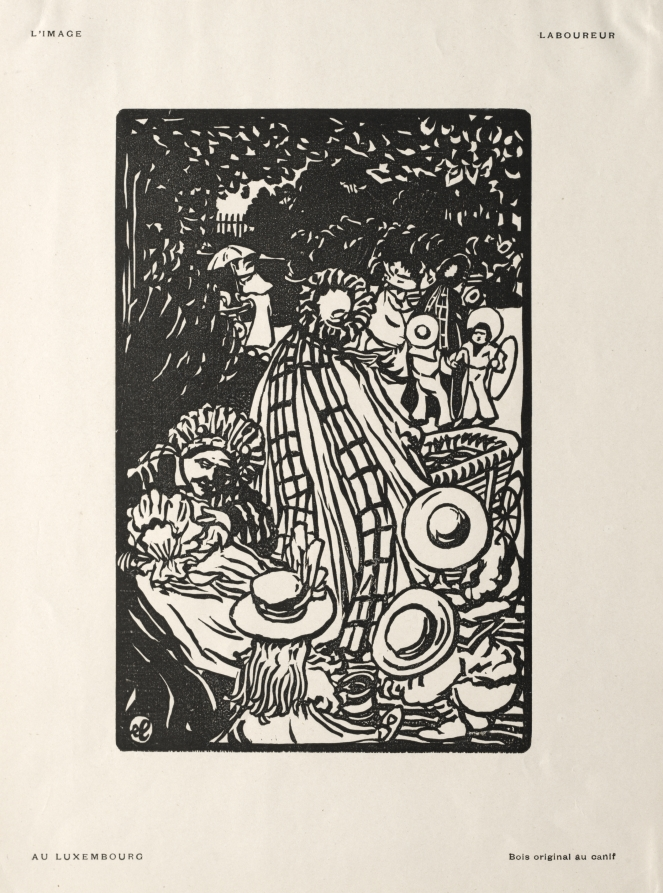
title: Au Luxembourg (At the Luxembourg Gardens)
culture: France, late 19th Century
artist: Jean-Émile Laboureur (French, 1877–1943)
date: 1897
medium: woodcut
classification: Print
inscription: Verso in graphite: "Au Luxembourg, 1898 J.L. 572"; printed in margins, top: "L'IMAGE/LABOUREUR"; bottom, "AU LUXEMBOURG/Bois original au canif." Monogram "el" signed in plate.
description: Threatened by the use of photomechanical methods to reproduce images in journals, printmakers formed various professional groups to demonstrate the artistic superiority of woodcut and wood engraving for the purpose of illustration. The Society of Wood Engravers (Société Corporative des Graveurs sur Bois) published a monthly art and literary review called L'Image (1896-97), in which Au Luxembourg appeared.